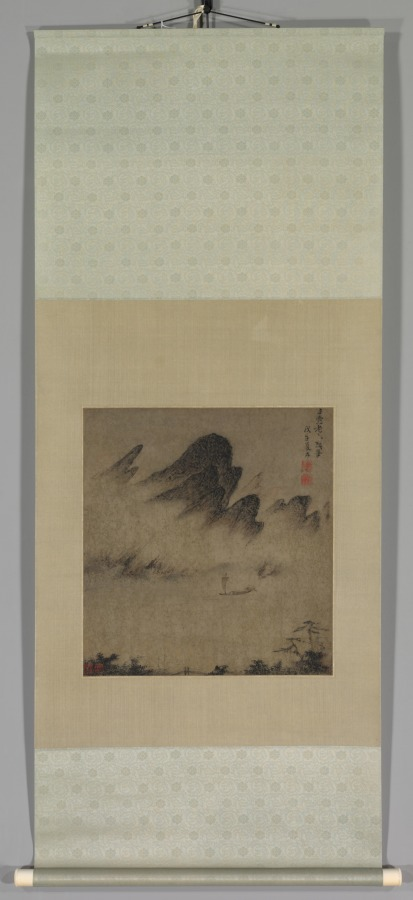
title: Landscape Ink-Play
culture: China, Yuan dynasty (1271-1368)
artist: Fang Congyi (Chinese, active c. 1340–80)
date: 1300s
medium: hanging scroll; ink and color on paper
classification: Painting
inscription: Inscription and 2 seals in the upper right. 2 complete seals and 1 partial in the lower left.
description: The painter created a paradoxical juxtaposition of the boat serenely sailing against the turbulent onrushing movement of the towering mountains in the background.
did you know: Fang Congyi was a painter and a Daoist priest.